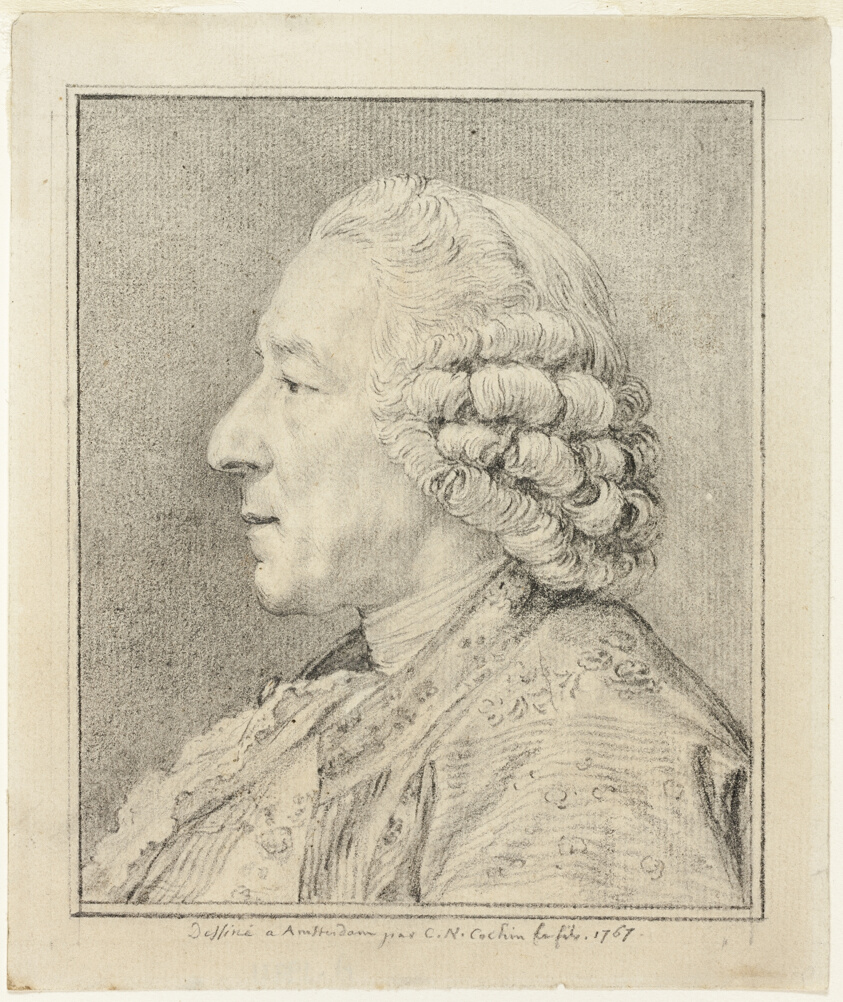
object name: Drawing and Watercolor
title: Bust of a Man in Profile to the Left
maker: Charles-Nicholas Cochin the younger; French, 1715-1790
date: 1767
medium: Graphite on ivory laid paper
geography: France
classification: graphite; drawings (visual works); prints and drawing